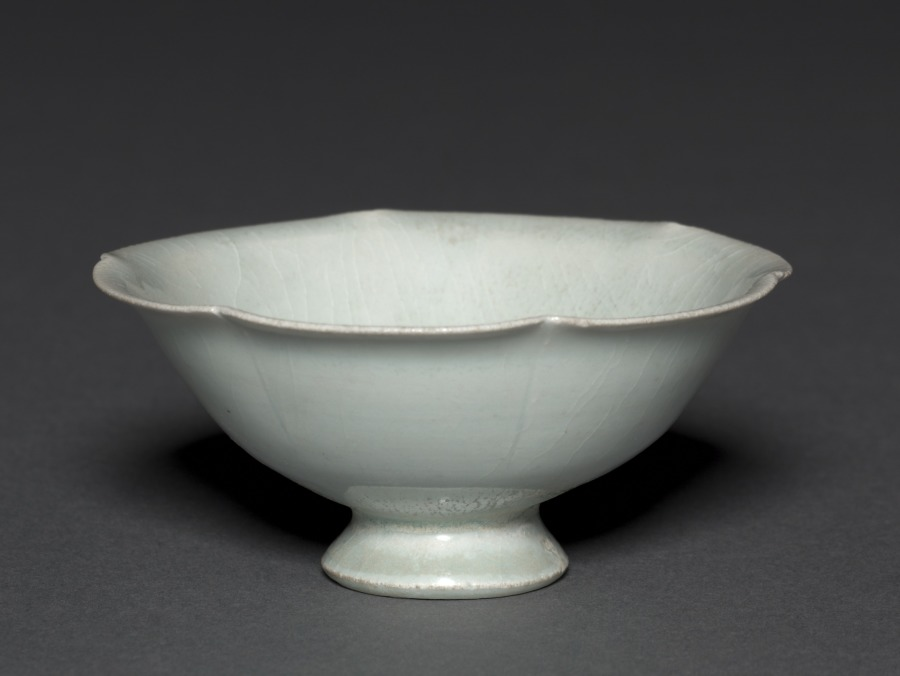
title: Cup and Stand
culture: China, Jiangxi province, Jingdezhen, Southern Song dynasty (1127-1279)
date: 1100s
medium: Porcelain with pale bluish-white glaze, qingbai ("blue-white") ware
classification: Ceramic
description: The kilns of Jingdezhen in Jiangxi province produced an extremely delicate porcelain made from the local resources of kaolin (white China clay) and petuntse (a feldspathic rock called china stone). It is glazed with a clear bluish-white glaze, thus the name qingbai (blue-white) or yingqing (shadowy blue) for this type of ware.